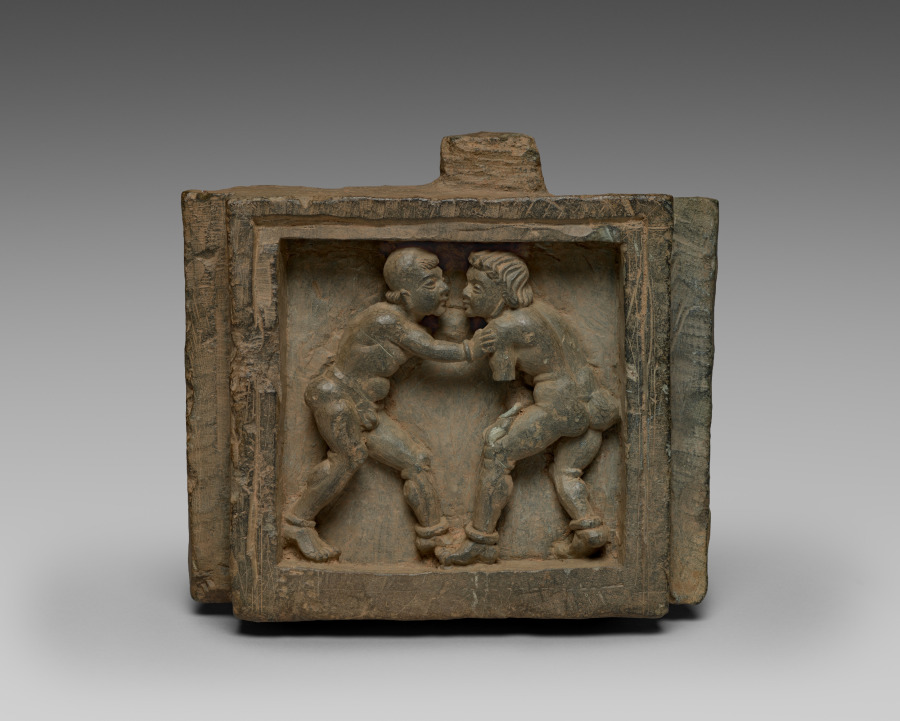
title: Architectural Bracket with Wrestlers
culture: Pakistan, Gandhara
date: 100s–200s CE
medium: schist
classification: Sculpture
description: This sculpture probably derived from Greco-Roman prototypes of nude athletes, but here it has probably been transposed into a scene from the boyhood of the Buddha, when it is said that he excelled in all forms of athletics.